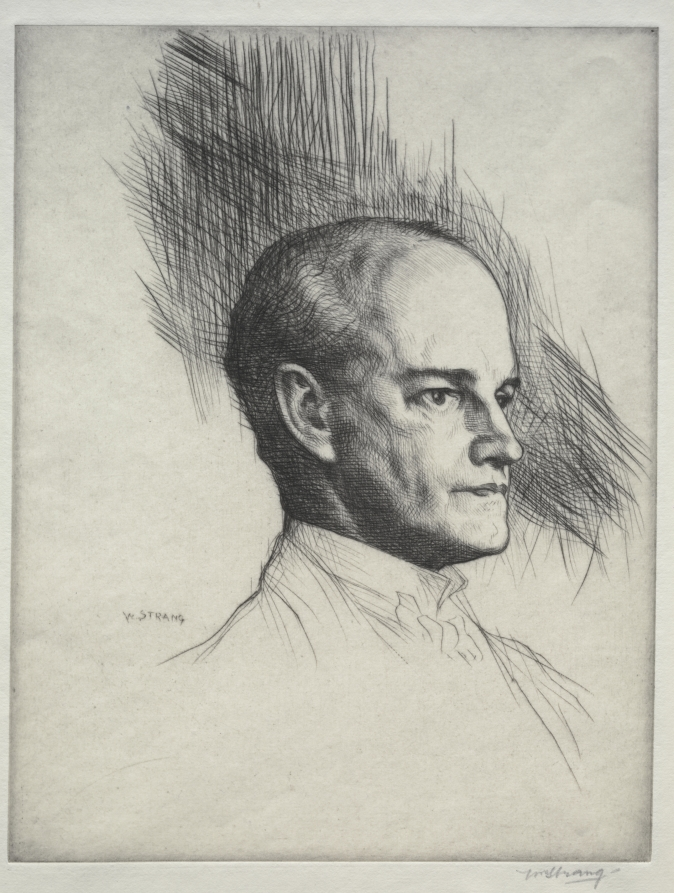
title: John Galsworthy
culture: England, 20th century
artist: William Strang (British, 1859–1921)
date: 1920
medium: engraving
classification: Print